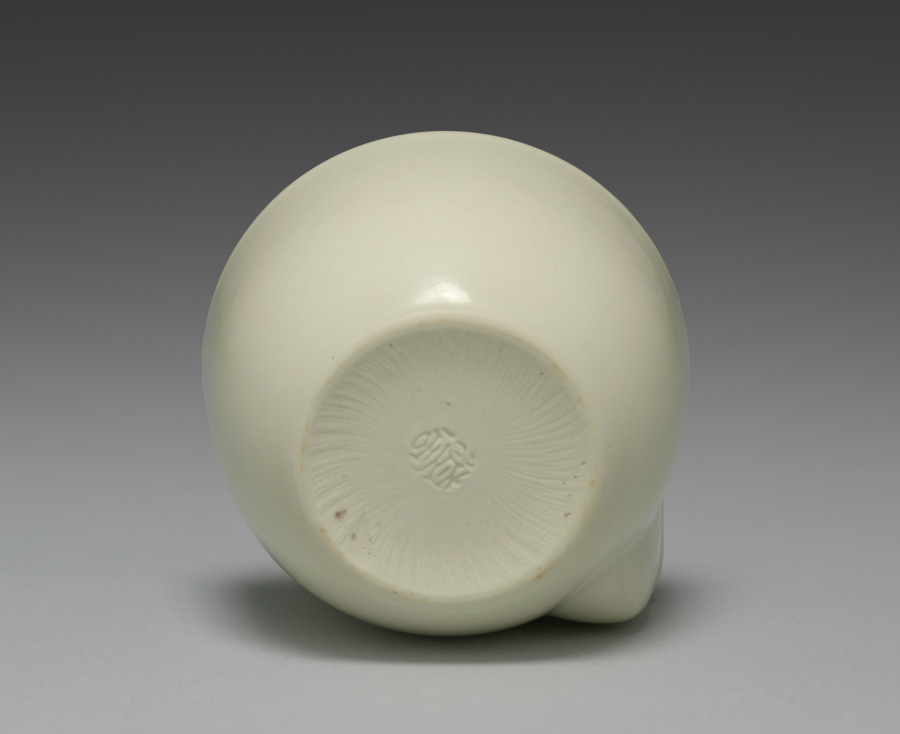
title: Hand-held Teapot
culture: Japan, Meiji period (1868–1912)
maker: Seifū Yohei III (Japanese, 1851–1914)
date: 1893–1914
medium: Porcelain with molded and carved design and cream glaze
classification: Ceramic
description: This teapot is of a variety used by advanced sencha practitioners. Called a hōhin, the pot is designed to be held directly by the fingers, with the body touching the upper part of the palm. This shape allows the host to manipulate the pot with a single hand and demonstrate dexterity. Direct contact between the ceramic body and the hand allows the host to closely gauge the temperature of the water within. There are differing grades of sencha, and for the finest one, gyokuro, the water temperature must be carefully regulated to achieve the proper flavor. This vessel is therefore efficacious for preparing this high-quality tea. The hōhin is also extremely portable, so it is well suited for impromptu gatherings. According to its box, this teapot is an example of taihakuji. “Great-white porcelain” was an important early invention Yohei III devised in 1972. It involved the combination of a distinctive translucent, creamy glaze over an ivory-colored clay body.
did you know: This pot’s restrained design includes on the lid’s handle a yin-yang motif, symbolizing the ideal balance between the forces of the universe.